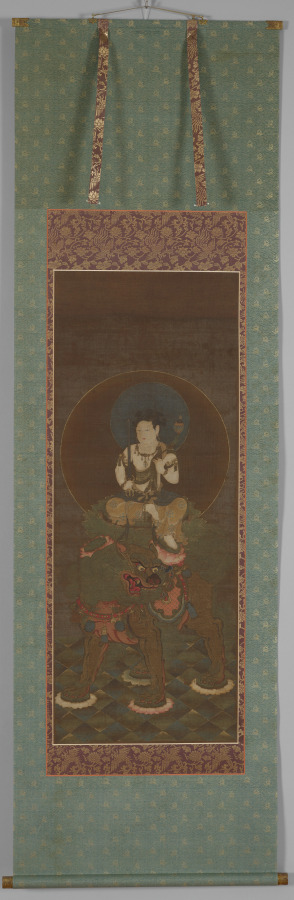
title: Monju with Five Hair Knots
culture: Japan, Kamakura period (1185–1333)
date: late 1200s–early 1300s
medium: Hanging scroll; ink, color, gold, and cut gold on silk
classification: Painting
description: This Buddhist painting shows Monju, Manjushri in Sanskrit, riding a lion. Monju is a bodhisattva, a being who, though enlightened, chooses not to become a Buddha but instead helps others achieve enlightenment. Monju’s youthfulness symbolizes his pure wisdom, unsullied by the world, and his five hair knots represent his vow to keep calamity at bay. The supernatural nature of his lion is emphasized by its hair, every strand painted in gold, as well as by the lotus platforms beneath each of its feet. The boy’s bejeweled body and silk finery is meant to resemble that of an Indian prince.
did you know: This painting is exemplary of the Kamakura period, known for artworks with special attention paid to the realism of images.